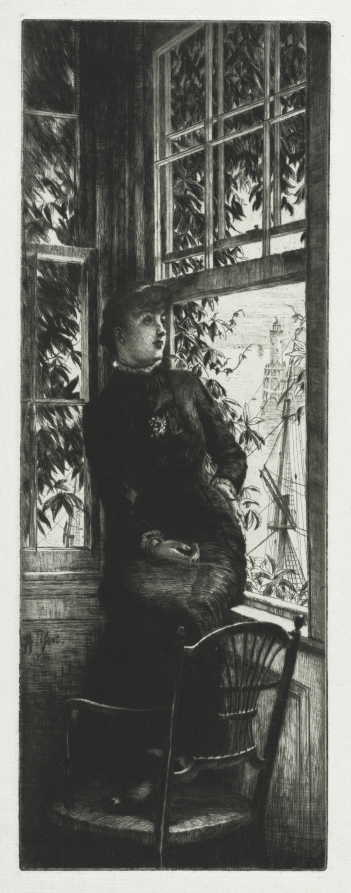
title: At the Sea Side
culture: France, 19th century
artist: James Tissot (French, 1836–1902)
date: 1880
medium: etching and drypoint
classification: Print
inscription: Signed and dated, in plate, at center left: .J.J. Tissot / 1880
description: This print is one of several works in which James Tissot represented his lover and frequent model, Kathleen Newton, near a window. Here, the young woman sits on an open sill, looking outward as if caught in a daydream. Although set in Tissot’s London home and featuring props from his studio, the image includes nautical details added by the artist to suggest a coastal location. The invented ship, lighthouse, and expansive sea visible outdoors convey a sense of longing for travel and freedom.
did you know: The sitter of this print, Kathleen Newton, tragically died of consumption just two years after Tissot's portrait.